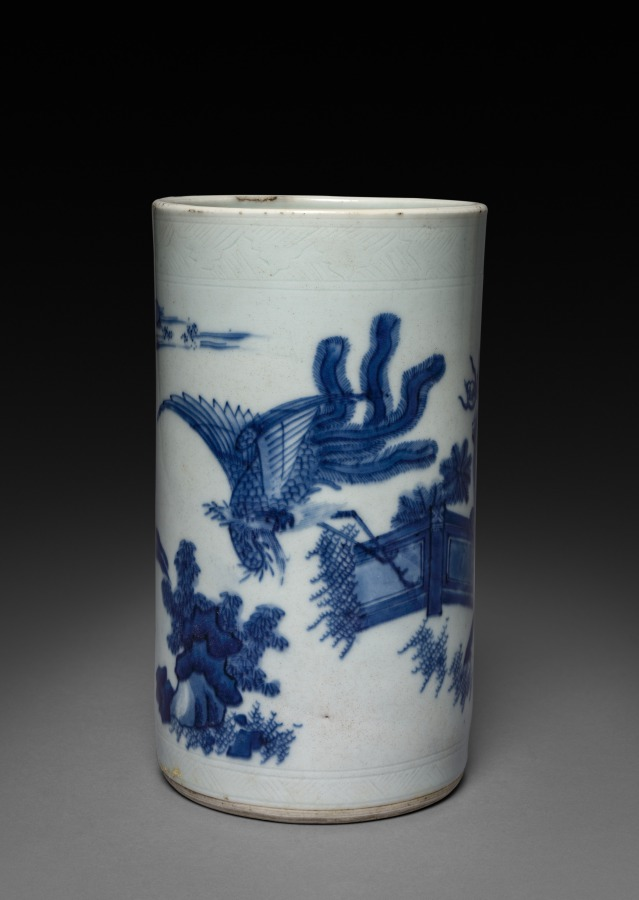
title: Brush Holder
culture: China, Jiangxi Province, Jingdezhen kilns, "Transitional period," Ming dynasty (1368–1644), Chongzhen reign (1628–1644)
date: 1628–44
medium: porcelain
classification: Ceramic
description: This porcelain brush holder is considered to have been made in the "Transitional period," a term used to define the period between about 1620 and 1683 when official kilns in Jingdezhen were no longer under imperial supervision due to the transition from the Ming to the Qing dynasties.